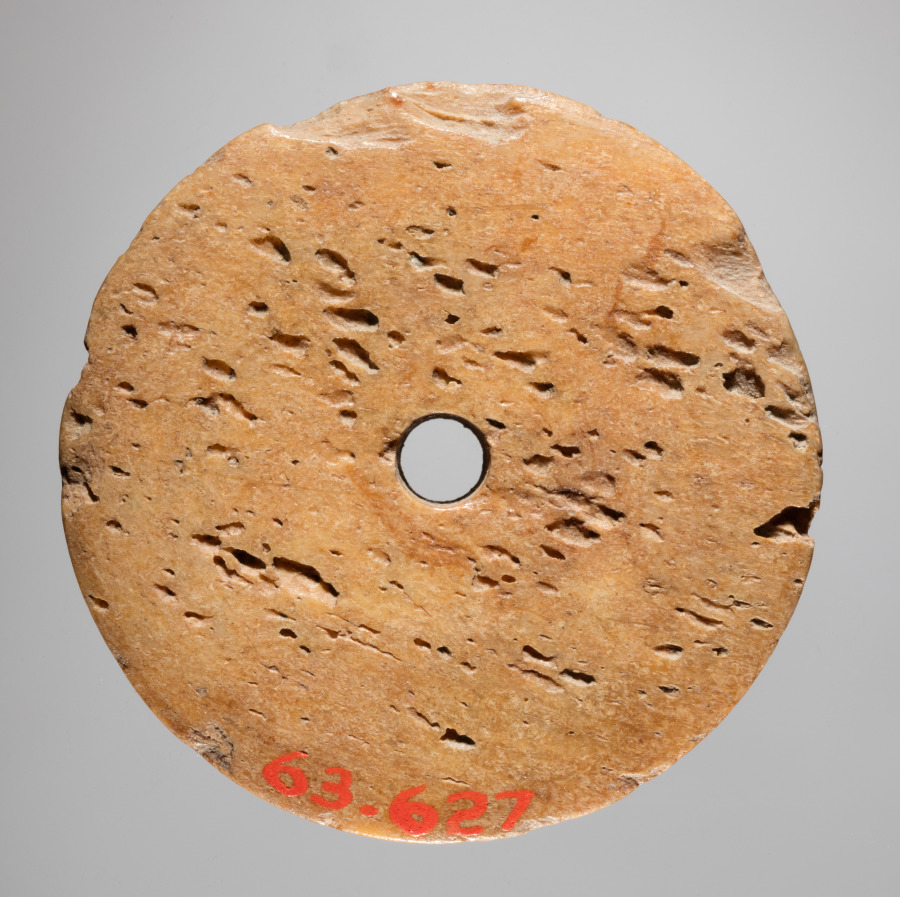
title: Spindle Whorl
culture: Iran, early Islamic period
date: 700s - 900s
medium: bone, incised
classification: Spindle Whorl